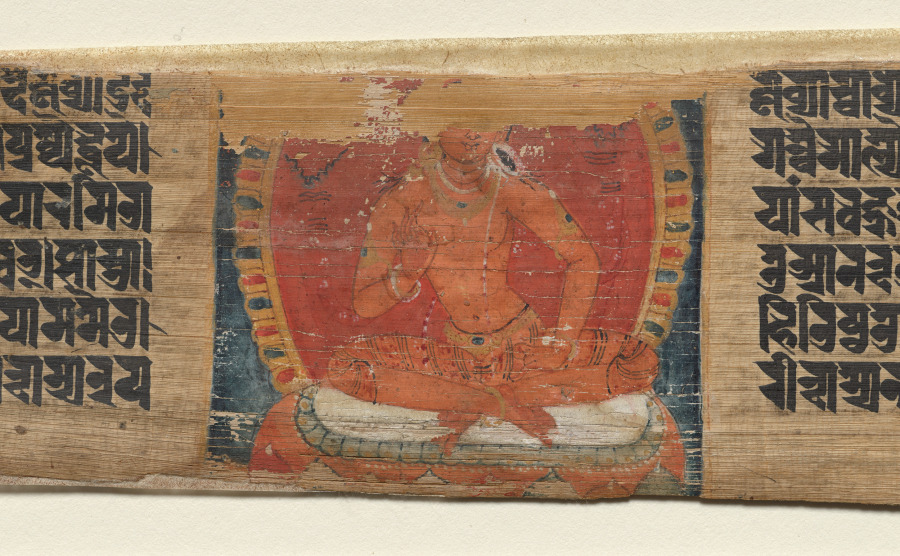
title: Prajnaparamita flanked by two bodhisattvas, folio 187 (recto), from a Manuscript of the Perfection of Wisdom in Eight Thousand Lines (Ashtasahasrika Prajnaparamita-sutra)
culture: Eastern India, Bihar, Vikramashila Monastery. Painting: Nepal, Kathmandu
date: Sunday, September 14, 1119 (year 239 of the Newar Samvat in the month of Ashvina)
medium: Gum tempera and ink on palm leaf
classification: Painting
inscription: [pravartayita]vyā deśayitavyopadeṣṭavyoddeṣṭavyā svādhyātavyā likhitavyā / tathāgatādhiṣṭhānena mahāpustake pravyaktapravyaktairakṣaraiḥ sulikhitāṃ kṛtvā satkartavyā gurukartavyā mānayitavyā pūjayitavyā arcayitavyā apacāyitavyā puṣpairdhūpairgandhairmālyairvilepanaiścūrṇaiścīvarairvādyairvastraiśchatrairdhvajairghaṇṭābhiḥ patākābhiḥ, samantācca dīpamālābhiḥ, bahuvidhābhiś ca pūjābhiḥ / iyamasmākamantikādānanda anuśāsanī / tatkasya hetoḥ? atra hi prajñāpāramitāyāṃ sarvajñajñānapariniṣpattirbhaviṣyati / tatkiṃ manyase ānanda śāstā te tathāgataḥ? ānanda āha - śāstā me bhagavan, śāstā me sugata / evamukte bhagavānāyuṣmantamānandametadavocat - śāstā te ānanda tathāgataḥ / paricarito 'smyānanda tvayā maitreṇa kāyakarmaṇā manaāpena, maitreṇa vākkarmaṇā manaāpena, maitreṇa manaḥkarmaṇā manaāpena / tasmāttarhi ānanda yathaiva tvayā mamaitarhi tiṣṭhato dhriyamāṇasya yāpayato 'smin samucchraye prema ca prasādaś ca gauravaṃ ca kṛtam, tathaiva tvayā ānanda mamātyayādasyāṃ prajñāpāramitāyāṃ kartavyam / dvir api trir api te ānanda parīndāmi anuparīndāmi enāṃ prajñāpāramitām, yatheyaṃ nāntardhīyeta, yathā nāsyāṃ tvamanyaḥ puruṣaḥ syāḥ / yāvadānanda iyaṃ prajñāpāramitā loke pracariṣyati, tāvattathāgatastiṣṭha[tīti]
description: In the center of the page is a seated goddess of wisdom, named Prajnaparamita, who personifies the content of the text itself. A red and white bodhisattva also attend her on either side. This manuscript, consisting of 188 double-sided folios, was calligraphed by a scribe at a monastery in northeastern India, commissioned by a monk from Nepal. Judging from the style of the paintings, they are the work of Nepalese artists.